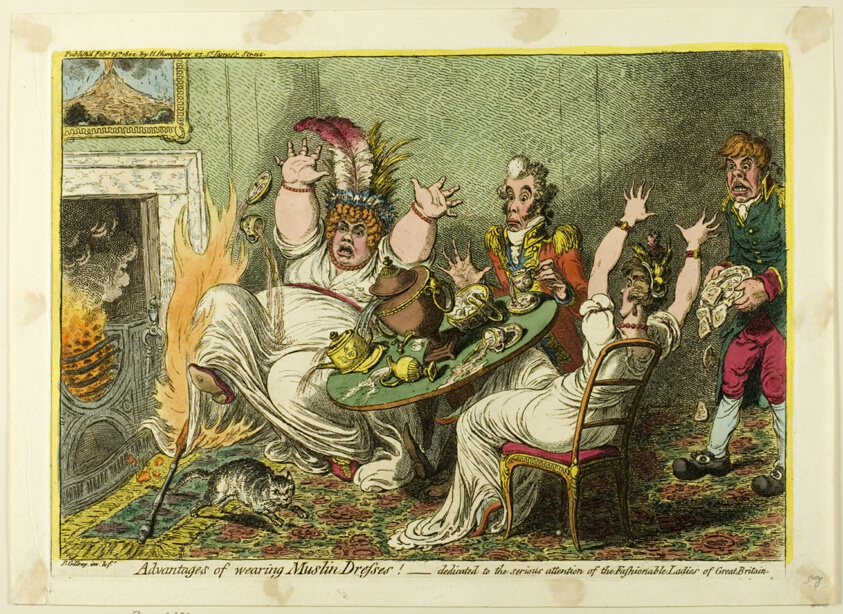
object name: Print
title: Advantages of Wearing Muslin Dresses!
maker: James Gillray (English, 1756-1815); published by Hannah Humphrey (English, c. 1745-1818)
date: published February 15, 1802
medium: Etching in black ink and watercolor on cream wove paper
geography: England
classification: etching; print; prints and drawing